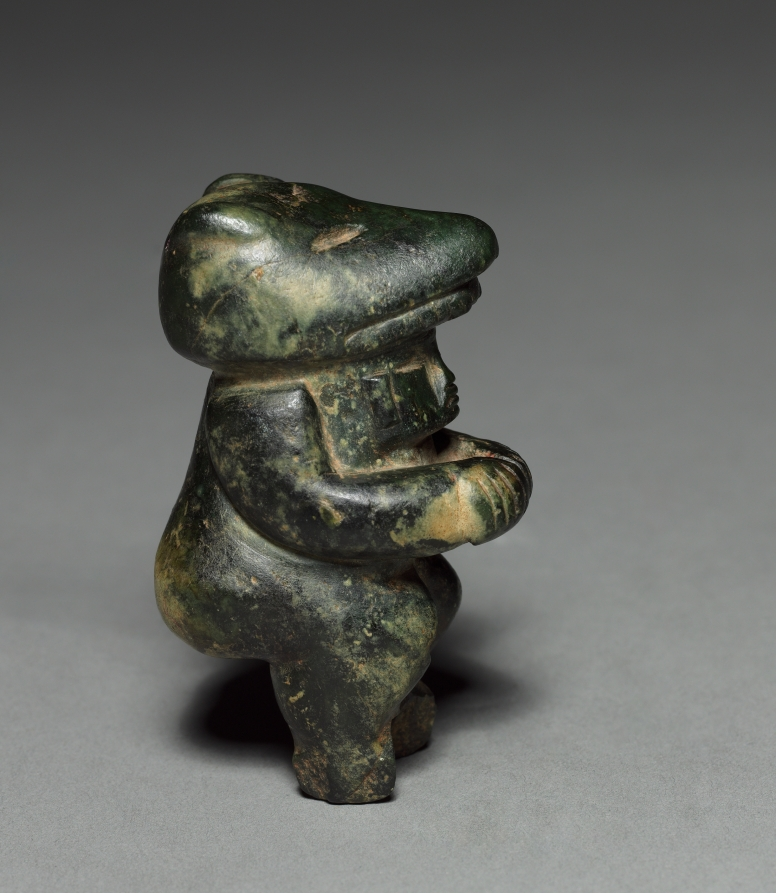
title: Figurine with Animal Headdress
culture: Pre-Columbian style(?), 20th century (?)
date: 20th Century(?)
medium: serpentine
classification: Sculpture